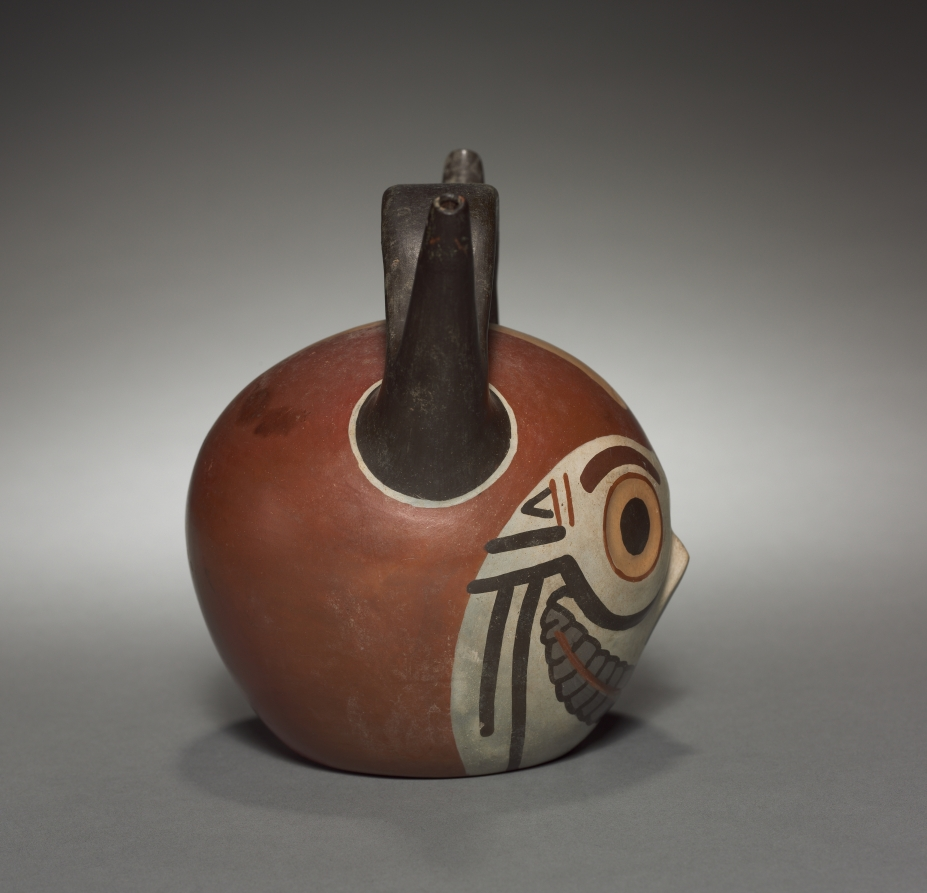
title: Skull Vessel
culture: Wari (Pachacamac) style, Middle Horizon, Epoch 2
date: 500–900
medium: earthenware with colored slips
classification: Ceramic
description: This vessel's clear, vibrant color reveals the inspiration of Wari ceramics in those of the South Coast Nasca. The twin spouts joined by a flat, handle-like bridge are also an old South Coast spout type.